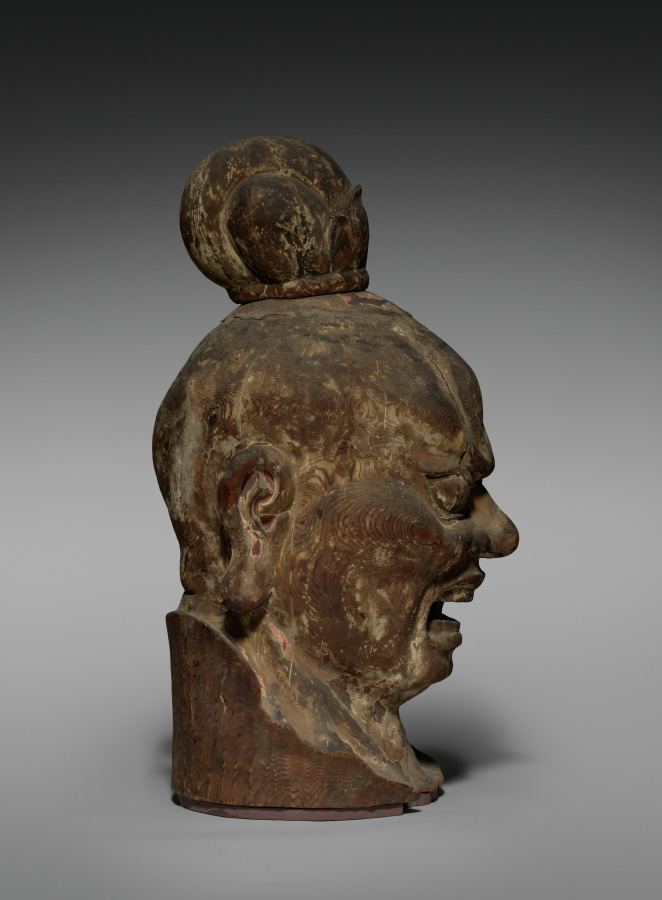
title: Head of Ni-o with Open Mouth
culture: Japan, Kamakura period (1185–1333)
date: 1200s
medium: wood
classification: Sculpture